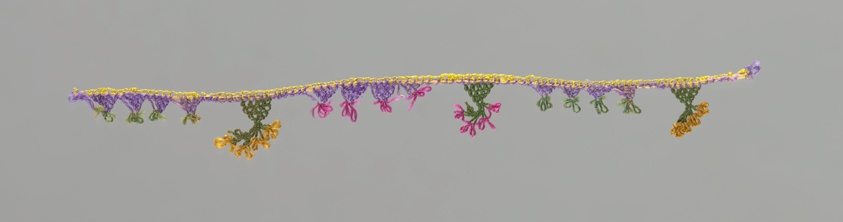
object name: Textile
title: Edging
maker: Eastern Mediterranean, probably Cyprus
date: 1875/1900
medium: Silk, horsehair, and cotton, needle lace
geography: Eastern Mediterranean Region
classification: textile; lace - needle